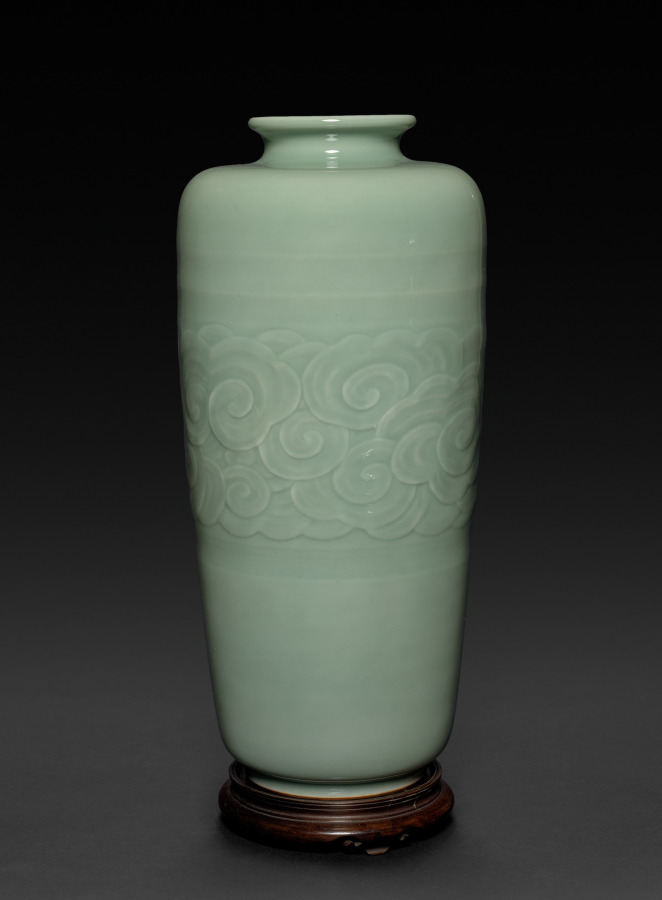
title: Tong-shaped Vase with Band of Cloud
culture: Japan, Meiji period (1868–1912)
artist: Seifū Yohei III (Japanese, 1851–1914)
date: 1893–1914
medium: Porcelain with molded and carved design and green glaze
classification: Ceramic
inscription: 清風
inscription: 帝室技芸員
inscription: 金聲玉振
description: Many of the vases created by Yohei III and IV were made with reference to and in emulation of Chinese ceramics in both form and glazing. The vessel type called tongping, pronounced tōbin in Japanese, is tall and cylindrical, like the thick length of bamboo referenced in the shape of the ideograph tong 筒. Unlike the ancient gu, hu, and guan, this form did not emerge in China until the Ming dynasty, and many such vases date to the early Qing dynasty. Two green-glazed vases, this one by Yohei III and the other by Yohei IV CMA 2022.228, are interpretations of this form. Yohei III’s version has slightly hunched shoulders and is somewhat wider at the top below the small neck and lip. Yohei IV’s vase is more angular. The wide rack of molded cloud encircling the Yohei III vase rises subtly from very low relief banding above and below it, accentuating the vessel’s rounded edges and complementing the form. In contrast, the allover flower vine pattern on the body and “seven treasures” pattern at the collar of the vase by Yohei IV evokes a garment’s cuffed sleeve, like the common English appellation for this type of vessel—“sleeve vase.”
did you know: Seifū Yohei III mined the repertoire of Chinese vessel types, from ceramics modeled after ancient ritual bronzes to shapes developed in the Yuan (1279–1368) and Ming (1368–1644) dynasties.